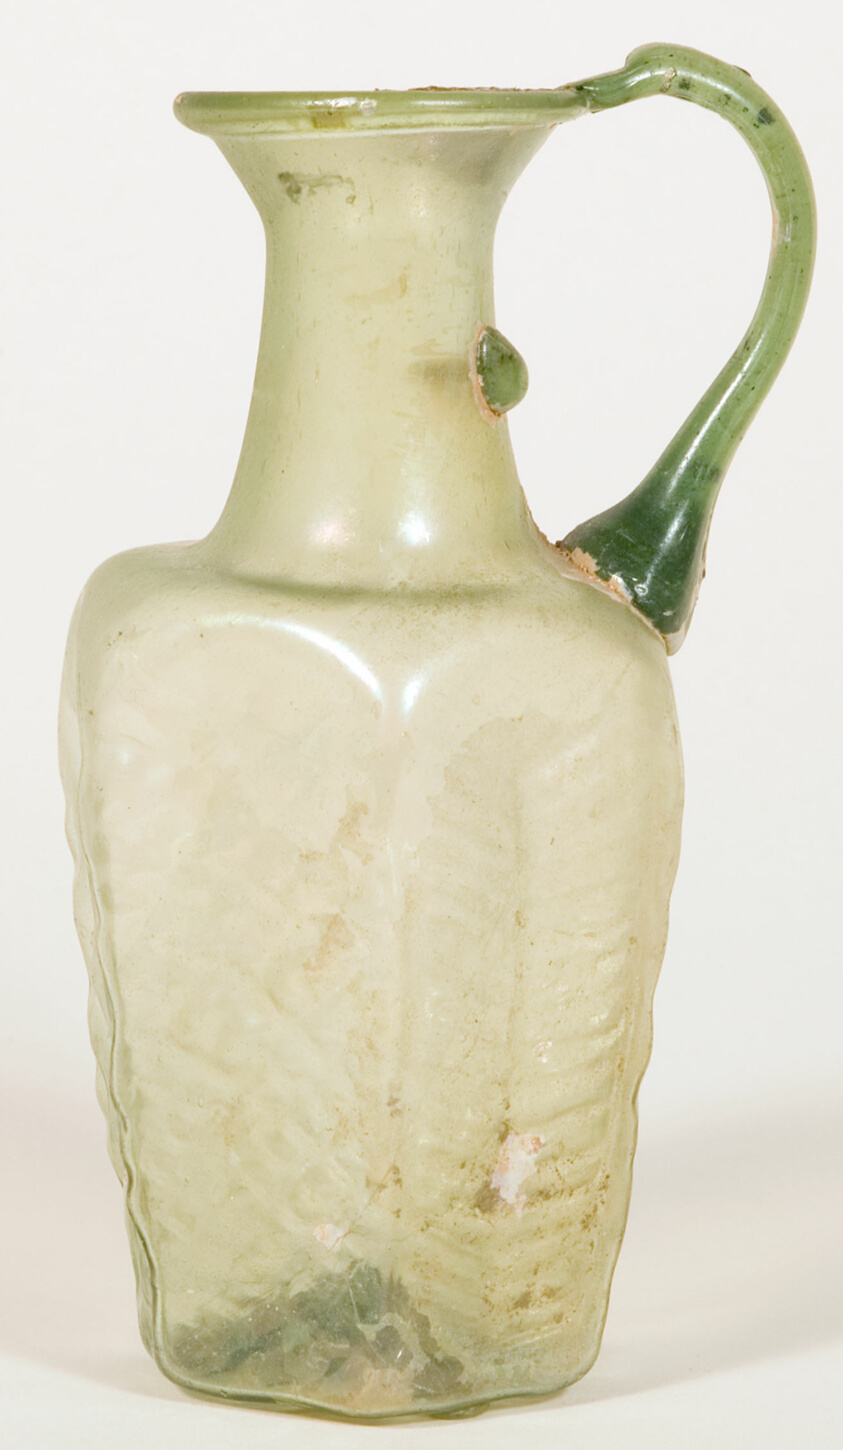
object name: Vessel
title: Jug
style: syrian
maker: Byzantine; Eastern Mediterranean, probably Syria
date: 6th century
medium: Glass, mold-blown technique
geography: Syria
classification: vessel; glass; ancient art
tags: vessels, religion